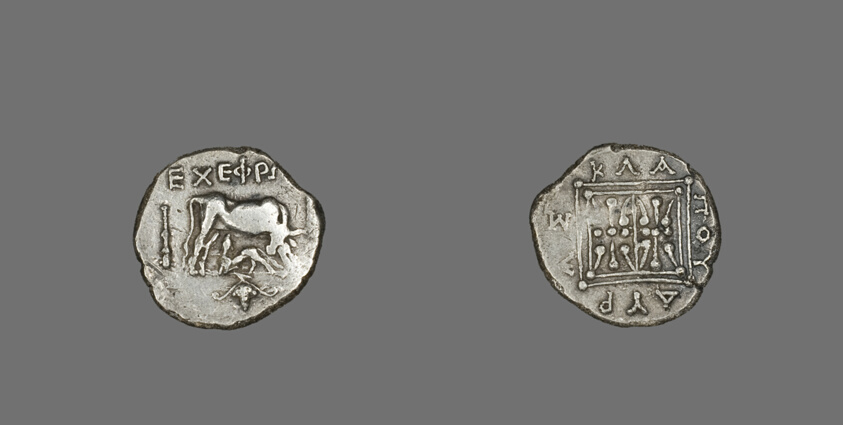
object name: Coin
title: Coin Depicting Cow Suckling Calf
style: greek, ancient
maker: Greek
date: 229-100 BCE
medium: Silver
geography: Greece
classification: coin; struck; ancient art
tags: cows